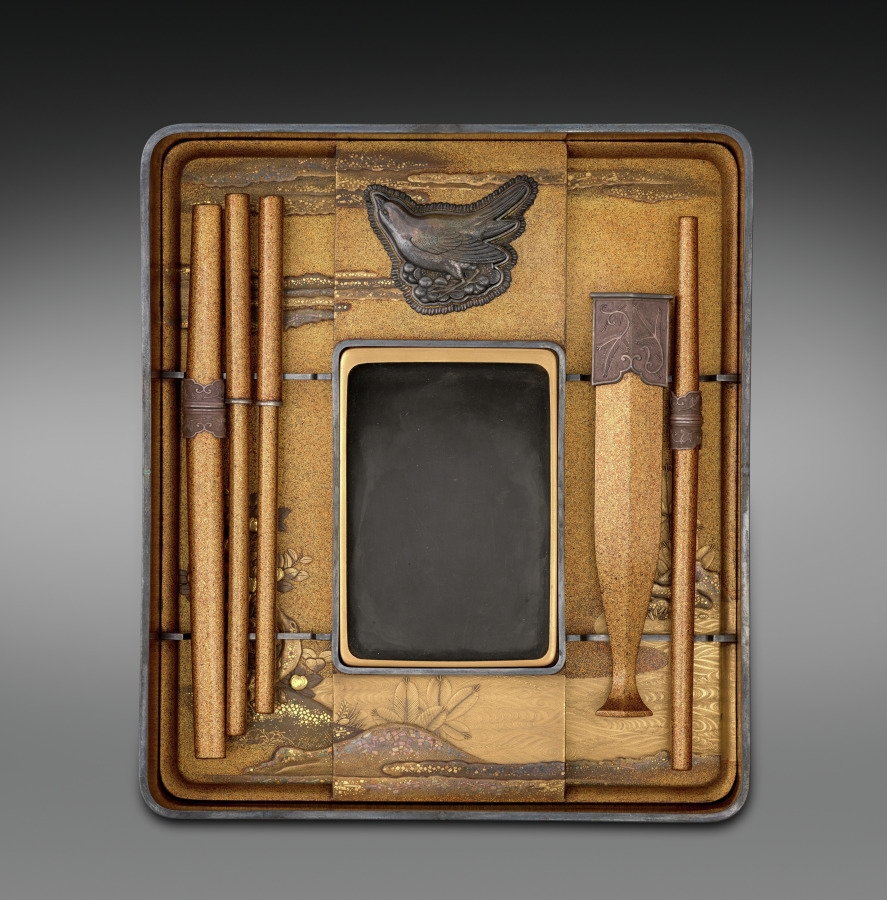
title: Writing Box (Suzuribako) with the “First Song” (Hatsune) Chapter from the Tale of Genji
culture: Japan, Meiji period (1868–1912)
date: early 1900s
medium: Lacquered wood with gold and silver sprinkled powder (maki-e), foil application (kirikane), and metal inlay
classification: Lacquer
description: The design of this box was inspired by an object in the 1639 lacquer wedding set of Chiyohime, the daughter of the shogun (ruler). Information about the set became available in the Meiji period, leading some lacquer artists to emulate its designs. This box features a scene from the chapter “First Song” (Hatsune) of the Tale of Genji, in which Prince Genji and his love Murasaki enjoy her garden. It incorporates the written characters for “first” (初, hatsu) and “sound” (音, ne), indicating the first song of the warbler in spring, associated with the new year—the water dropper for mixing the ink is in the shape of this bird.